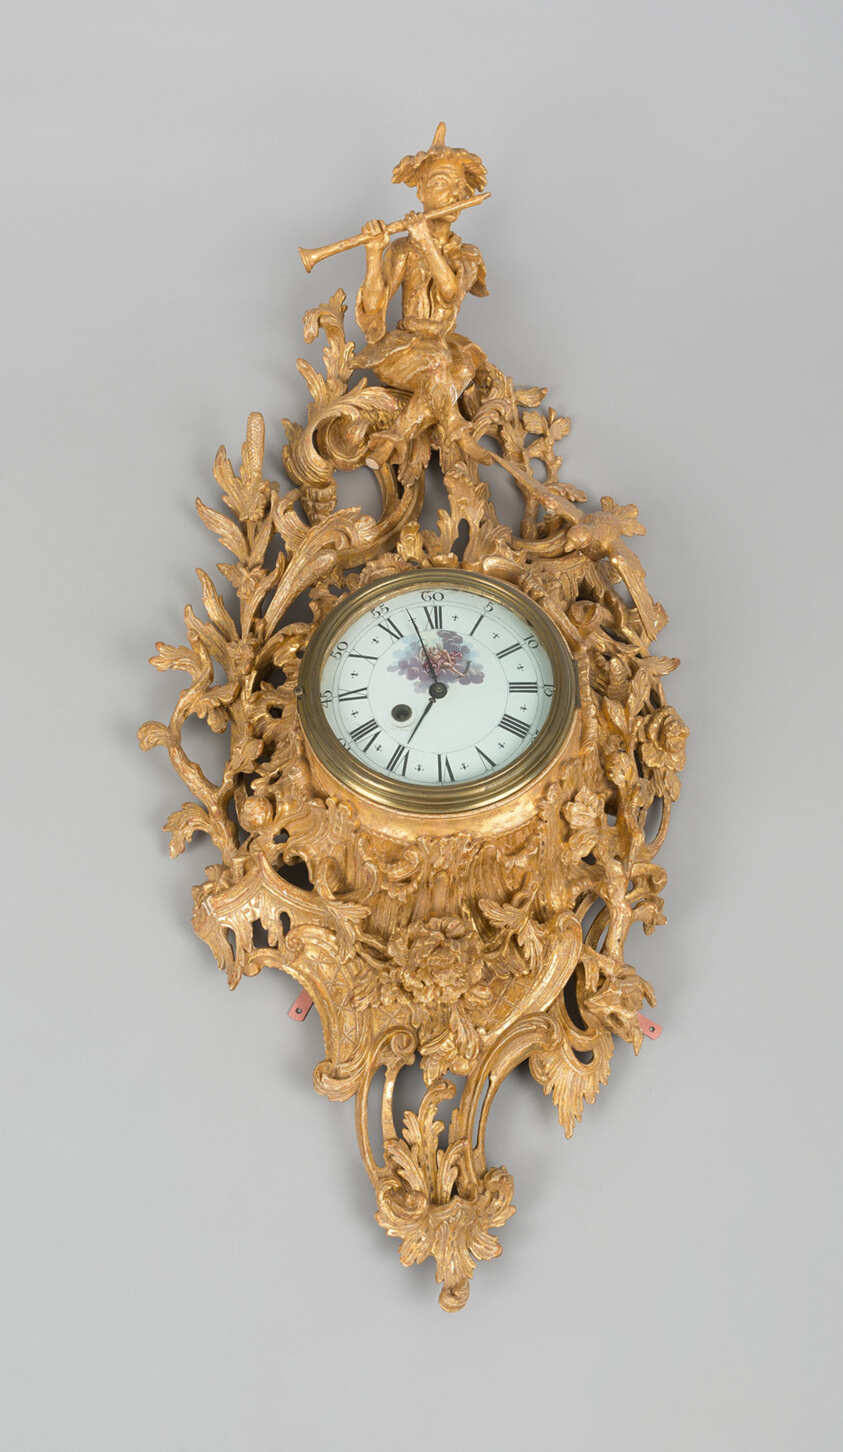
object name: Furniture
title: Wall Clock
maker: England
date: c. 1750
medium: Pine, carved, gessoed, and gilded; enamel, brass, and glass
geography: England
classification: clock; furniture; european decorative arts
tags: furniture